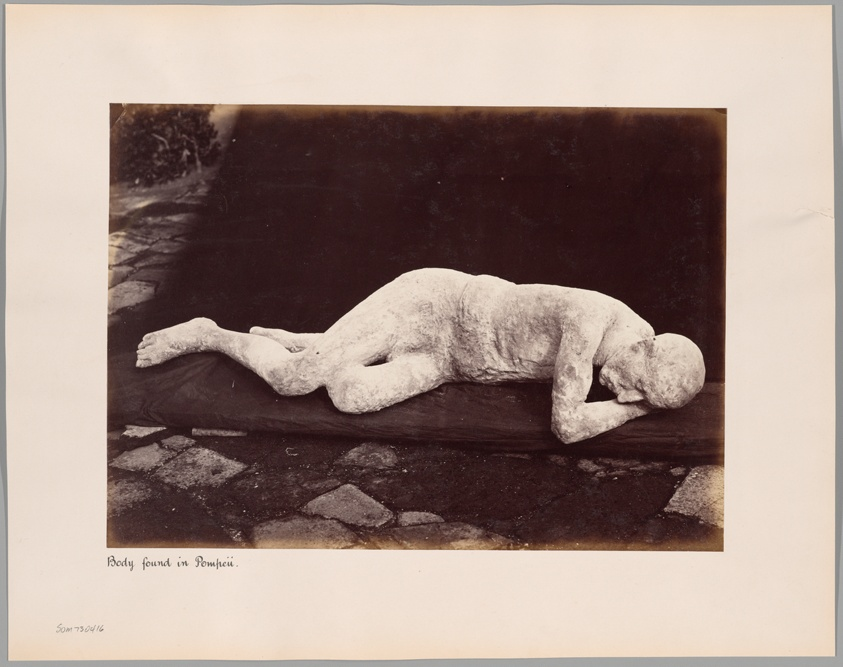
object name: Photograph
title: Plaster Cast of Body, Pompeii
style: 19th century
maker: Giorgio Sommer (Italian, 1834–1914)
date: 1880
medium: Albumen print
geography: Italy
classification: photograph; albumen silver print; photography